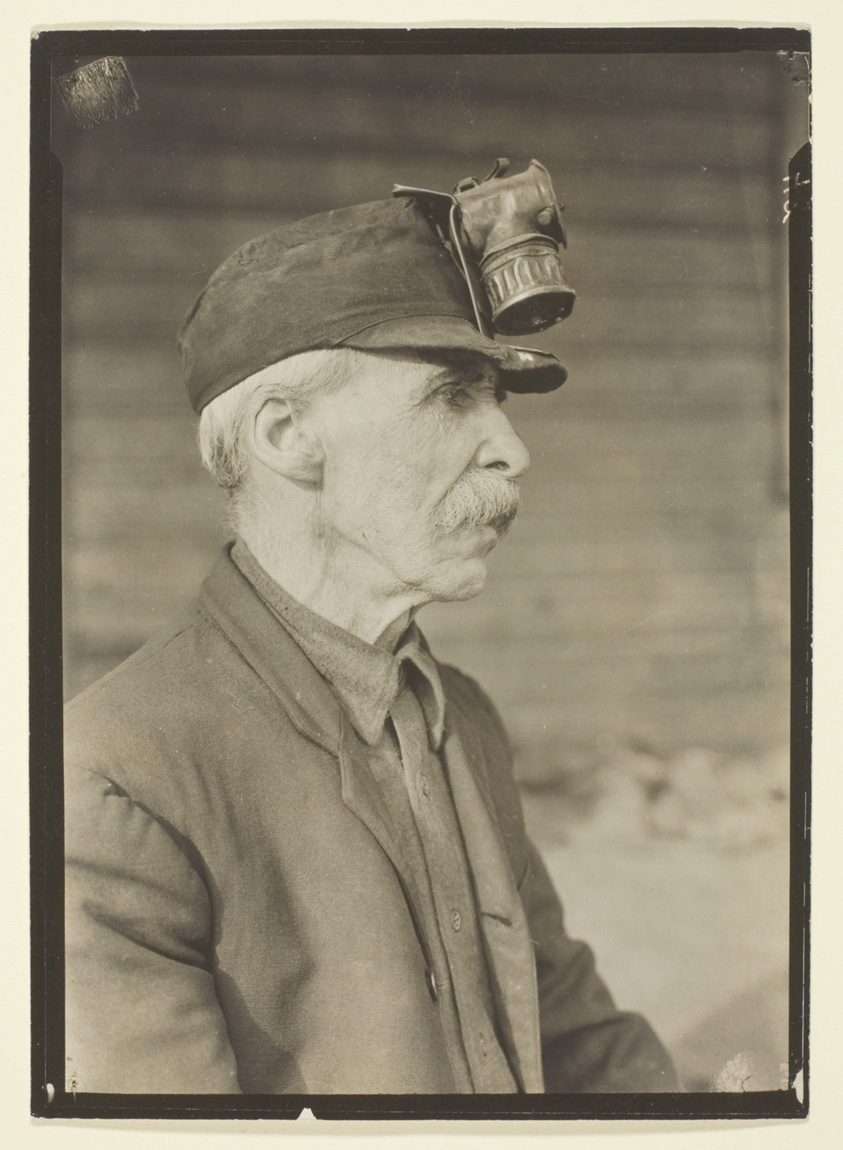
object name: Photograph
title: English Coal Miner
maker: Lewis Wickes Hine (American, 1874–1940)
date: 1921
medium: Gelatin silver print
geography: United States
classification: gelatin silver (developing-out-paper) pr; photographic process; photography; photograph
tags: Collected by Hugh Edwards